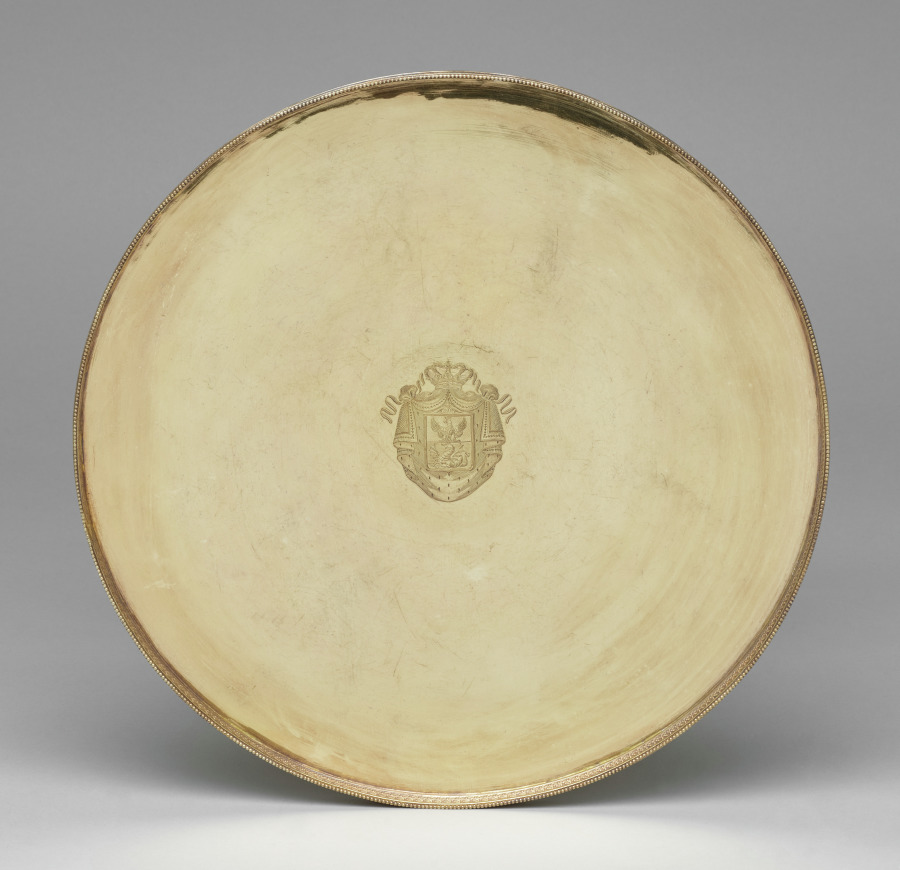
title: Tazza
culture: Italy, Rome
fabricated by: Pietro Paolo Spagna (Italian, 1793–1861)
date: c. 1815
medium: silver gilt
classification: Silver